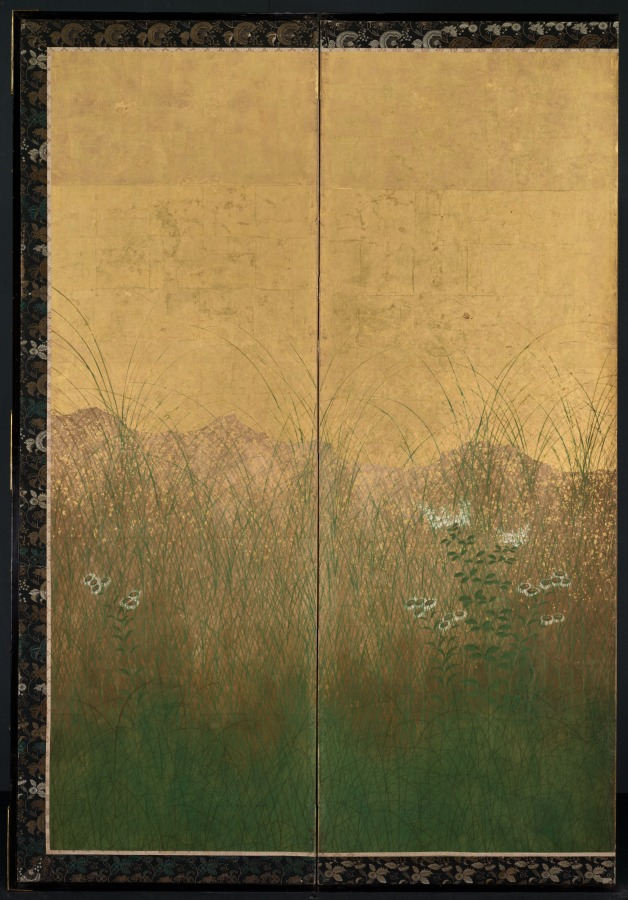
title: Autumn Evening with Full Moon on Musashino Plain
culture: Japan, Edo period (1615–1868)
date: early 1600s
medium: One of a pair of six-fold screens; ink, color, and gold and silver foil on gilded paper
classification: Painting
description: Tall grasses and autumn flowers reach out of thick green undergrowth in this depiction of the plain of Musashi, a site famous from classical Japanese poetry. A silver disc, now tarnished, represents the full moon. Flecks of cut-gold foil in the sky evoke the day’s passage into night. Once a wilderness with a vast horizon, Musashi is now densely populated.